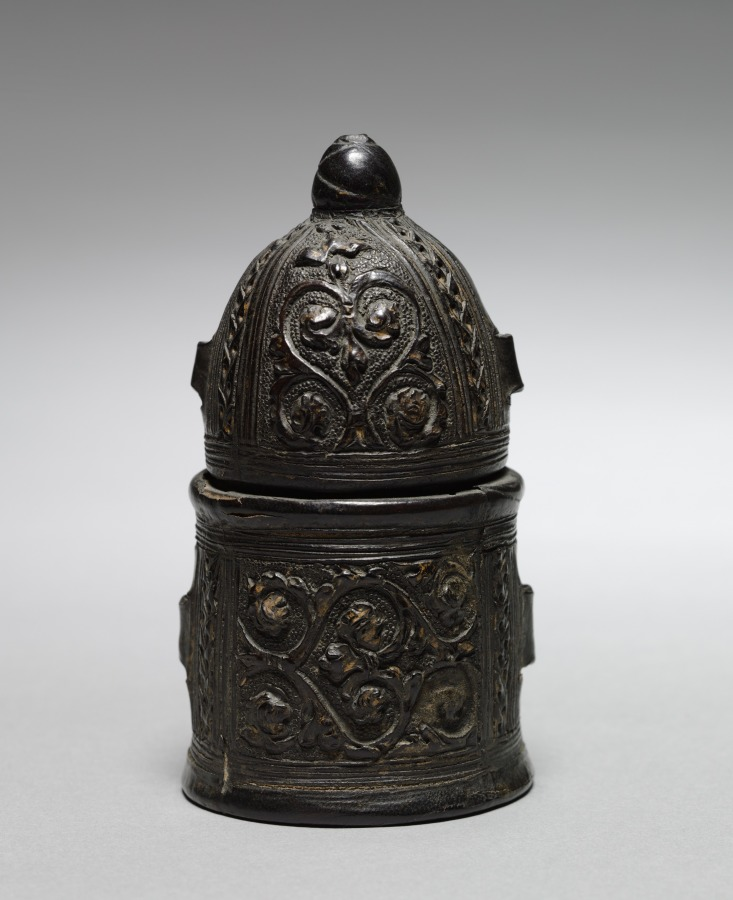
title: Ink Pot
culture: Northern Italy, 15th century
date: c. 1425–1450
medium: leather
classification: Leather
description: Intended for use on the writing table, this ink pot was used with a dip pen or quill. It may have belonged to a professional scribe or scholar, or perhaps to a wealthy layperson. The leather is embellished by tooling, embossing (pressing), and punching.